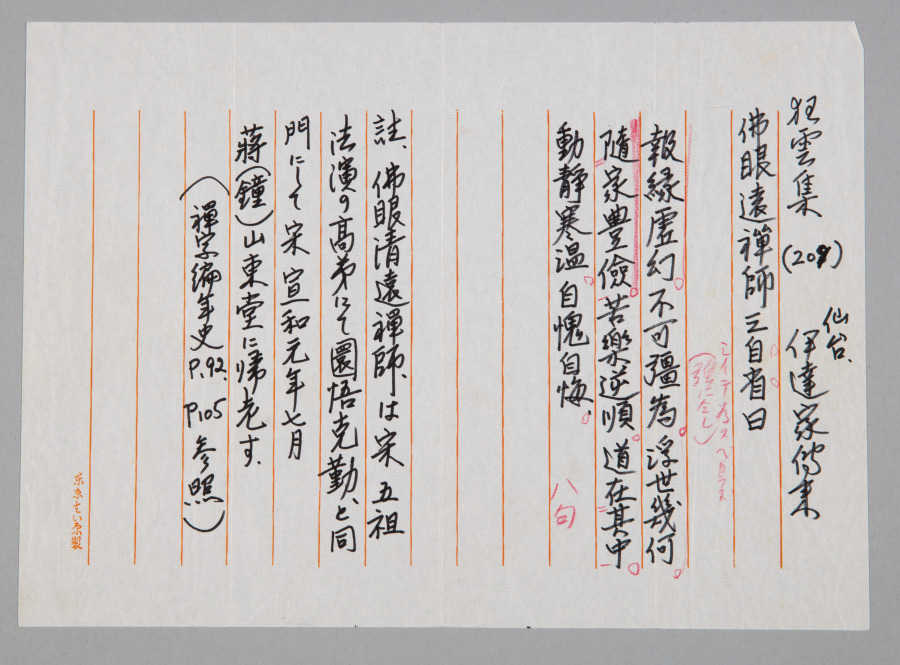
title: Reflections of Priest Foyen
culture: Japan, Muromachi period (1392–1573)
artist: Ikkyū Sōjun (Japanese, 1394–1481)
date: 1400s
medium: hanging scroll, ink on paper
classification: Painting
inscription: signed: "Kido nanasei son, Ikkyūshi Sōjun sho (Written by Ikkyū Sōjun, the seventh generation of Kido)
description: Left by his mother at a small Zen temple in Kyoto at the age of six, Ikkyu later drew on his early studies and experiences for his writings, which focused on his keen interest in the Chinese classics. Poetry in particular was a favorite subject and images from classical poetry or passages from favorite poems or commentaries frequently provided Ikkyu with the core ideas for his own work. A rare example of his calligraphy, this narrow scroll contains a verse in eight phrases, each comprising four characters. The whole verse is organized in three towering lines of brusque, emphatic calligraphy augmented by Ikkyu's signature-the two lines of running script in the lower left corner. The text refers to a passage included in the Chronicle of the Zen Sect that contains a cautionary reminder attributed to the legendary Chinese monk Foyen Qingyuan (1067-1120), long revered in Japan. The initial phrase begins: "Life is a mirage."